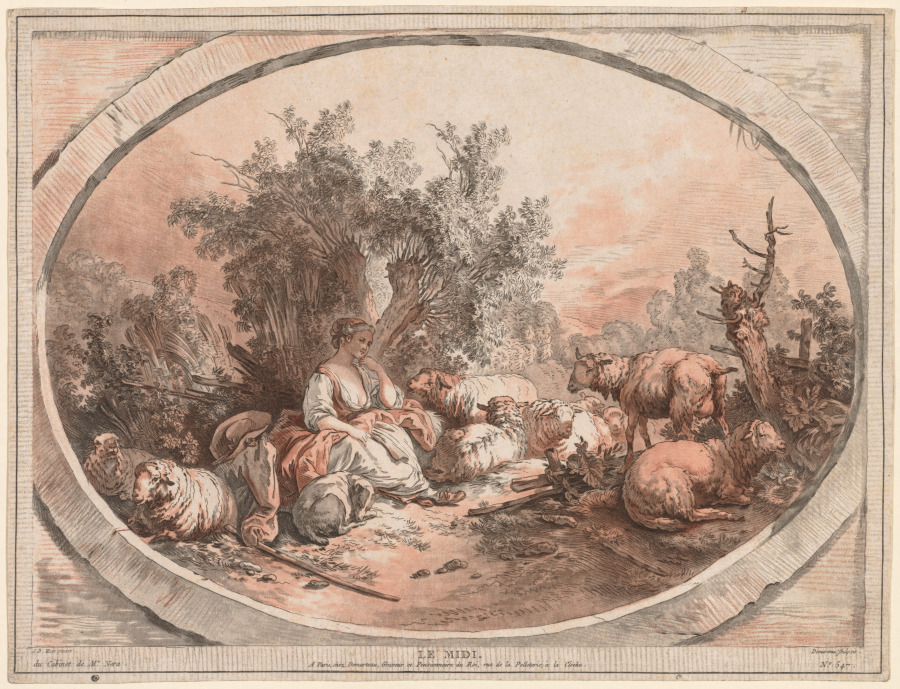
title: Noon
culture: France, 18th century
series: The Four Times of Day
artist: Gilles Demarteau (French, 1722–1776)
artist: after Jean-Baptiste Marie Hüet (French, 1745–1811)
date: c. 1776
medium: chalk-manner etching and engraving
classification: Print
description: Scenes representing times of day or the seasons were frequently used to thematically decorate rooms, and were suitable subjects for suites of prints. This example depicting a young shepherdess avoiding the noonday sun is from a set that also features Morning, Afternoon, and Evening. Each scene portrays the bucolic life of a shepherd or shepherdess in a rural landscape. Demarteau colored the prints to appear like drawings made with black and red chalk with wash, similar to Boucher’s The Departure of Jacob nearby.